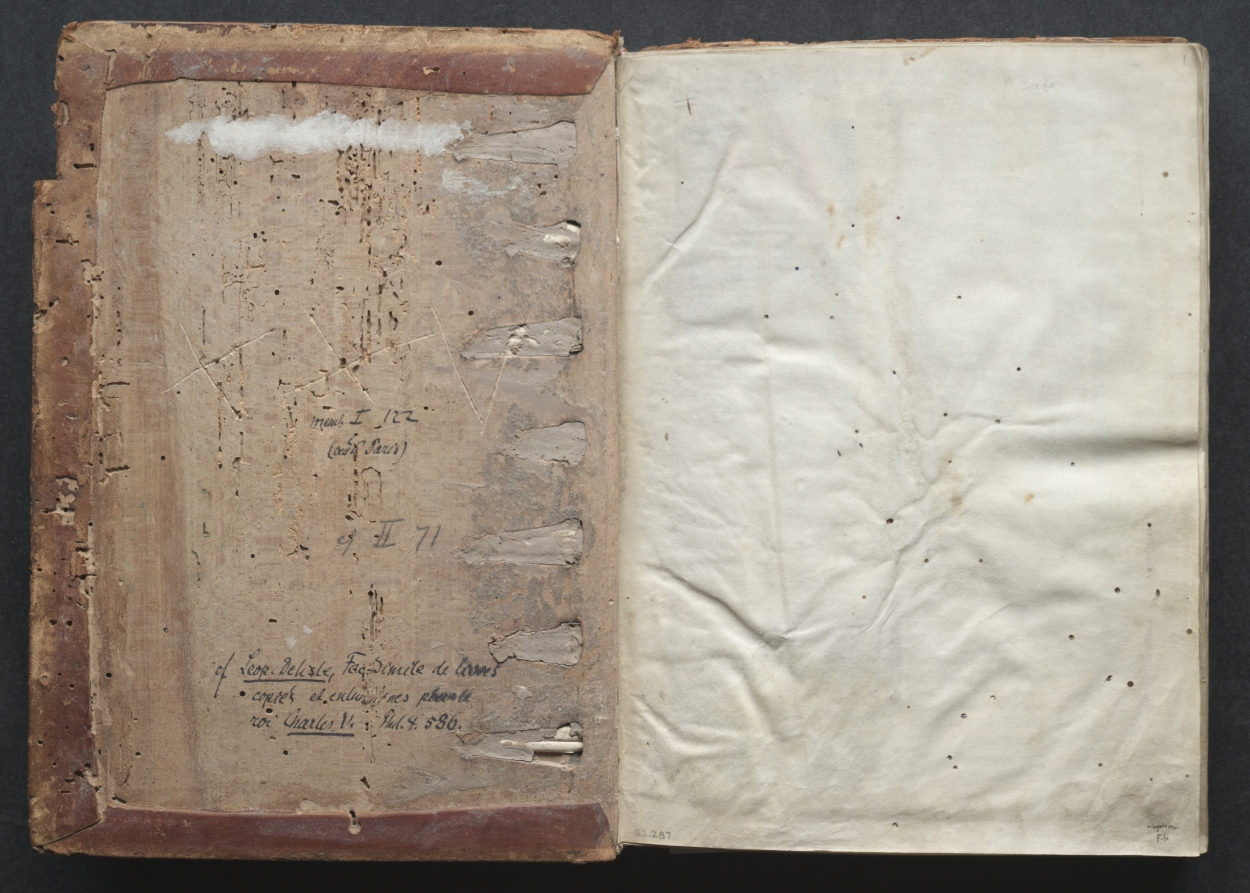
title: The Gotha Missal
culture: France, Paris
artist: Master of the Boqueteaux (French)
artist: and Workshop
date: c. 1375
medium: ink, tempera, and gold on vellum; blind-tooled leather binding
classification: Bound Volume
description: The style and quality of this manuscript's decoration is typical of deluxe Parisian books made for aristocratic or royal patrons. Most of the book's decoration appears to be the work of the Master of the Boqueteaux, an artist active at the court of King Charles V (died 1380). His style was apparently shared by a number of book illuminators working in and around Paris. It is very possible that the Gotha Missal belonged to Charles V, but is not provable because the manuscript has no royal portraits and lacks a colophon. Given the book's magnificent decoration, however, it would seem that it was produced for a Valois prince, if not for the king himself. The manuscript receives its name from the German dukes of Gotha, its later owners.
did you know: The artist received his name because of his tendency to draw trees that resembled little mushrooms.